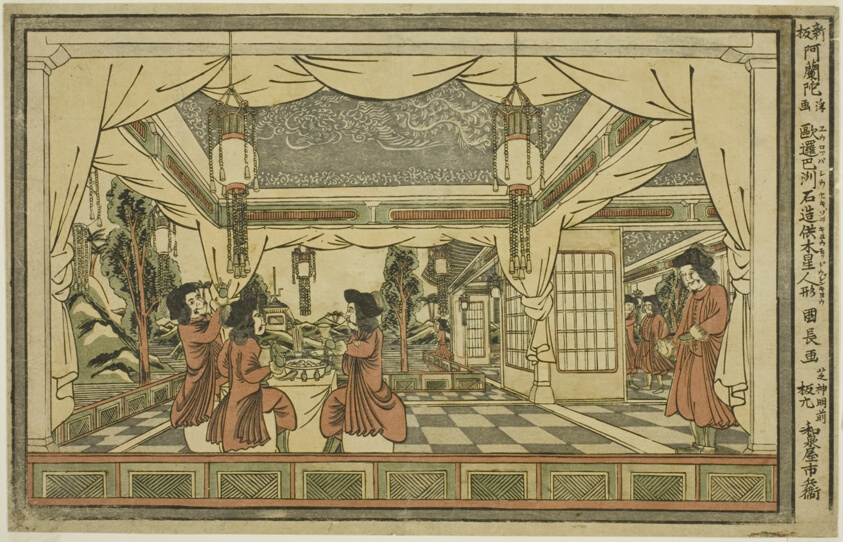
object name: Print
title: The Stone Temple and Statue of Zeus in Europe (Yoroppashu sekizo kyo mokudo jinkyo), from the series "Newly Published Dutch Perspective Pictures (Shinpan Oranda uki-e)"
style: Japanese (culture or style)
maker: Utagawa Kuninaga (Japanese, died 1827)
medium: Color woodblock print; oban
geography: Japan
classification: print; asian art